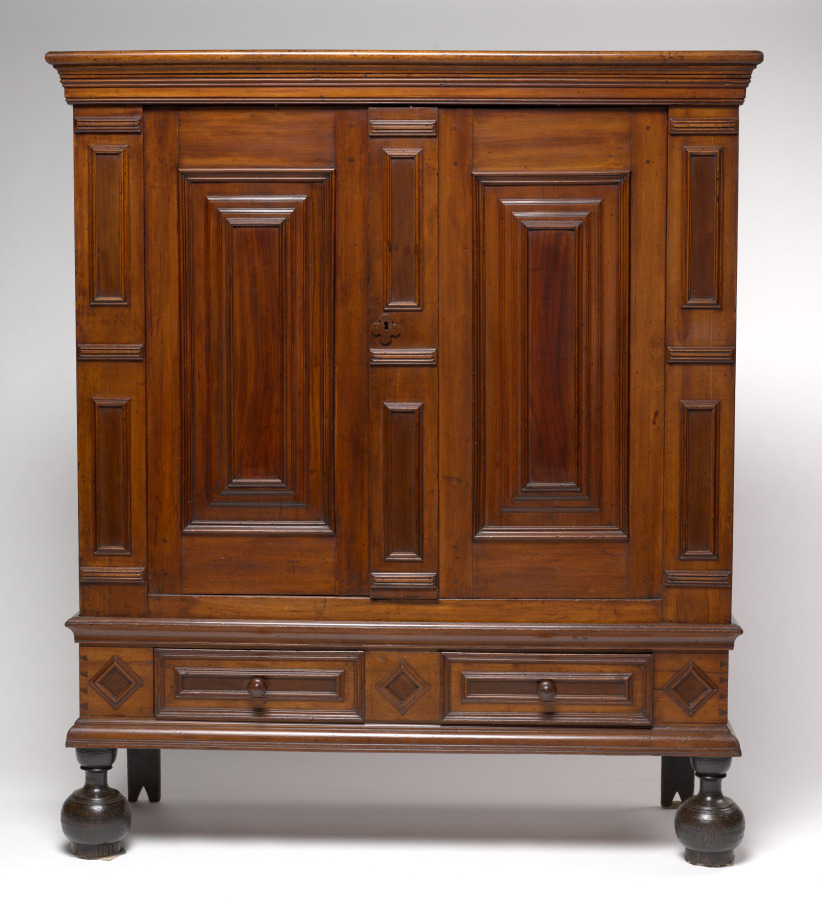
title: Kast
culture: American, King County, NY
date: c. 1710–1740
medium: Various woods, wrought iron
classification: Furniture and woodwork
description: The earliest furniture made in America often shared similarities with works made in the country from where the settlers originated. With its bun feet, paneled surface, and broad projecting cornice, this wardrobe (kast) resembles earlier Dutch examples that come from Amsterdam and its surrounding areas. Therefore, this wardrobe was likely made by the Dutch settlers who colonized New York and New Jersey.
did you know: This Dutch American wardrobe was likely made in a community along the Hudson River in New York by a cabinetmaker who had originally come from the region in or around Amsterdam in Holland.